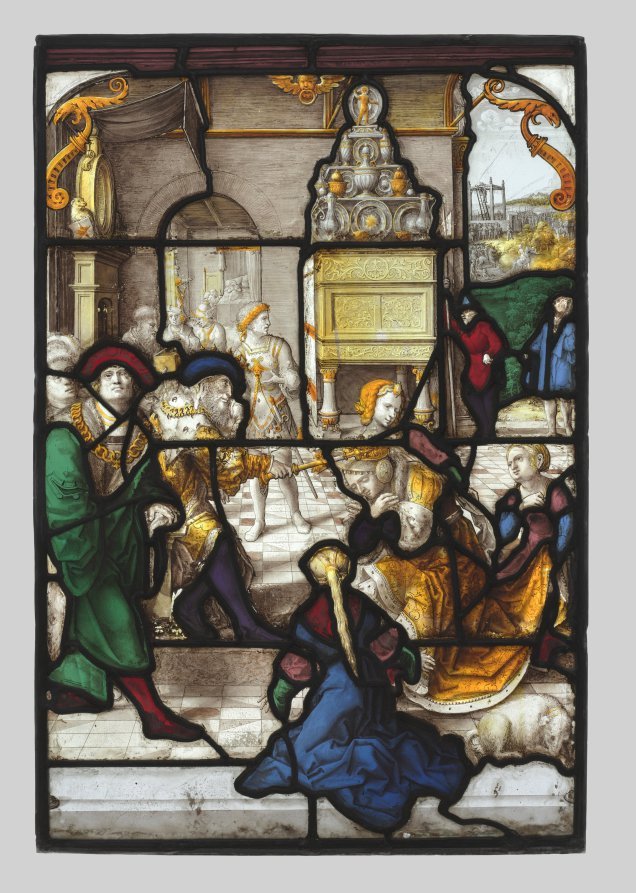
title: Esther before Ahasuerus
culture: Netherlands, South Lowlands, 16th century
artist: Dirk Vellert (Netherlandish, 1480/85–1547)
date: c. 1530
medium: pot metal, white glass, and silver stain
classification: Glass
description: Though also a painter and printmaker, Dierick (or Dirk) Vellert is best known as a designer of stained glass. Active in Antwerp, where he became a master of the Guild of Saint Luke in 1511, Vellert richly ornamented his work with garlands, masks, vases, and other classically inspired motifs. A great deal of his glass was exported. As an engraver, his prints owe a good deal to Albrecht Dürer and Luca van Leyden. These two panels depict famous incidents from the Old Testament featuring the rendering of judgment. Both may have originally been made for a council chamber or a court of justice. Conceivably, because of their subjects, they could have served as models of justice for the magistrates who deliberated within view of them.